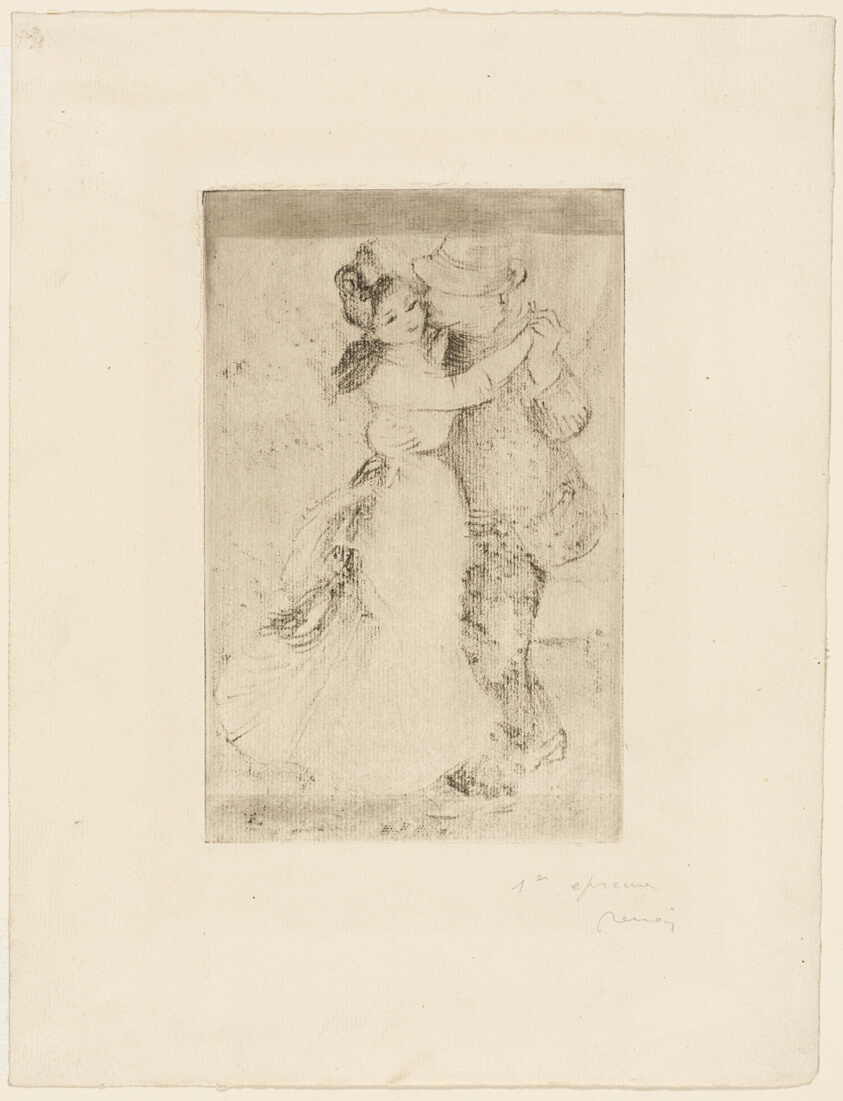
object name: Print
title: Dance in the Country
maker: Pierre Auguste Renoir; French, 1841-1919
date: c. 1890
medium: Soft ground etching in brown-gray on ivory laid paper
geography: France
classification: etching; print; prints and drawing